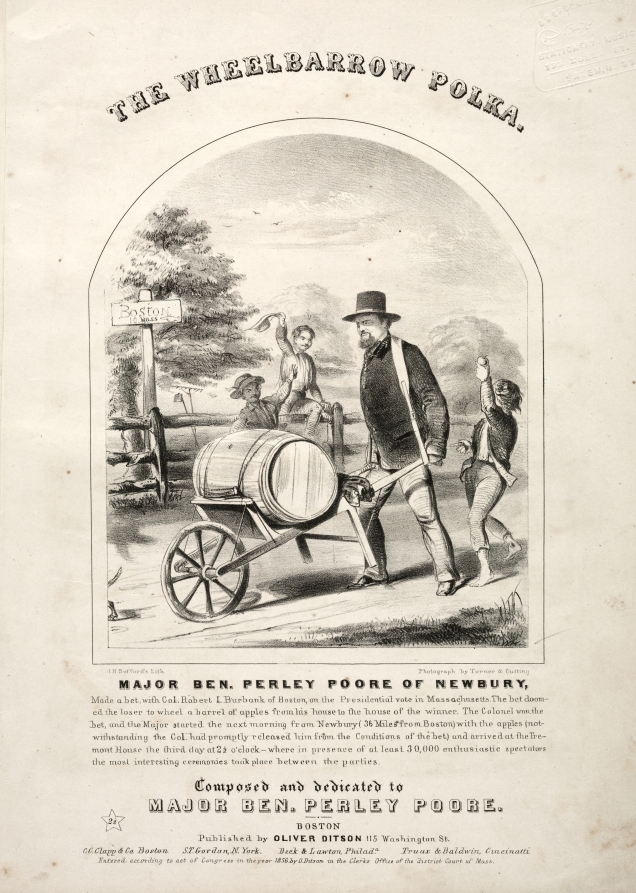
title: The Wheelbarrow Polka - Sheet Music Cover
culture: America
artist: Winslow Homer (American, 1836–1910)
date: 1856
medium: lithograph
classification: Print